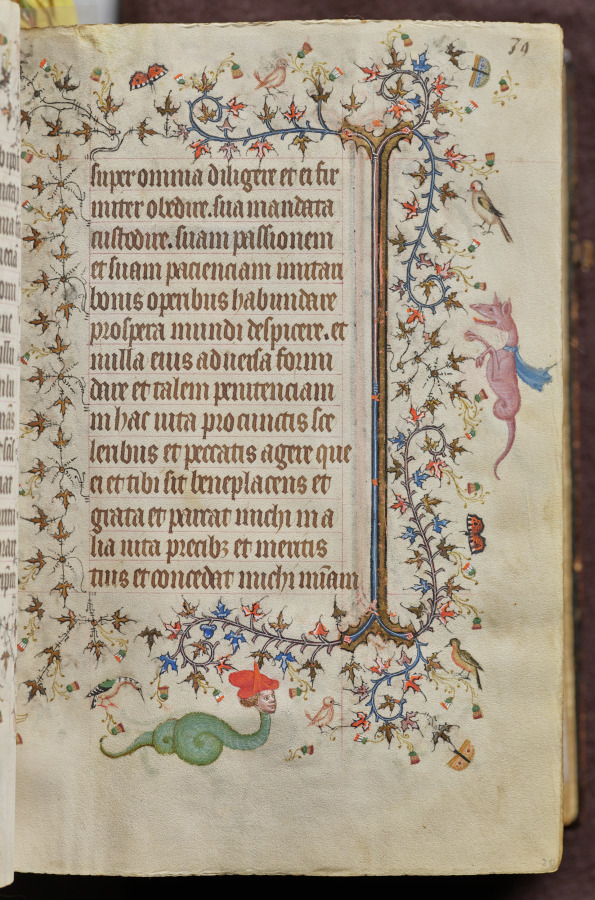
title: Hours of Charles the Noble, King of Navarre (1361-1425): fol. 20r, Text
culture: France, Paris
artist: Master of the Brussels Initials and Associates (French)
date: c. 1405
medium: ink, tempera, and gold on vellum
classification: Bound Volume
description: This precious volume was obviously highly prized by its owner, the French-born King of Navarre, who had his coat of arms painted on no less than twenty folios. Rather than directly commissioning this manuscript from a specific workshop, it seems that Charles the Noble acquired his book of hours -- perhaps ready-made for the luxury market -- while on a trip to Paris in 1404-05. A collaborative effort, six painting styles are evidenced within the pages of this codex, those of two Italians, two Frenchmen, and two Netherlanders. The painter who was responsible for the planning and decoration of the book, and who produced seventeen of the large miniatures, was a Bolognese artist known as the Master of the Brussels Initials. His principal assistant, responsible for most of the borders, was a Florentine who signed his name "Zecho" da Firenze on folio 208 verso.